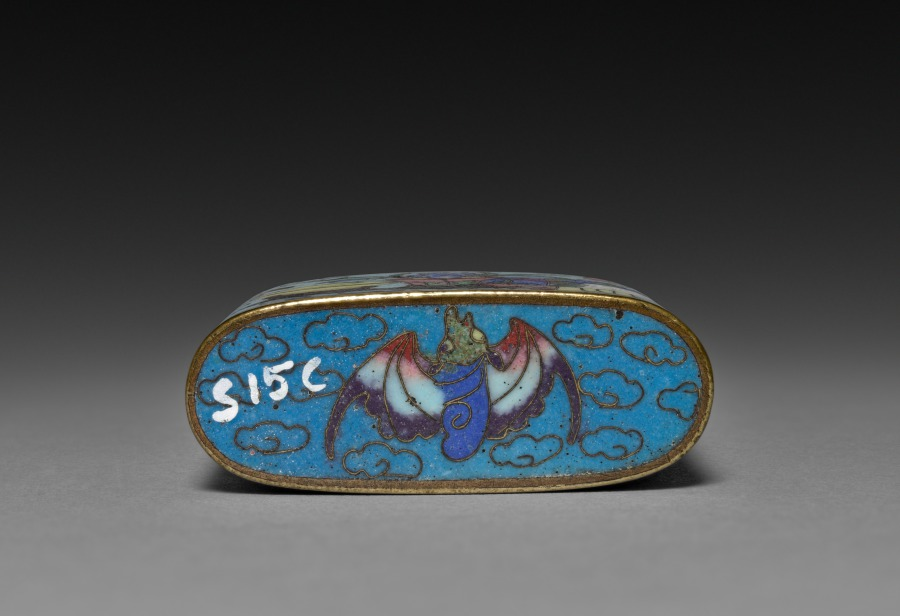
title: Box with Scholar's Accoutrements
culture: Japan, Meiji period (1868–1912)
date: late 1800s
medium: cloisonne enamel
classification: Enamel